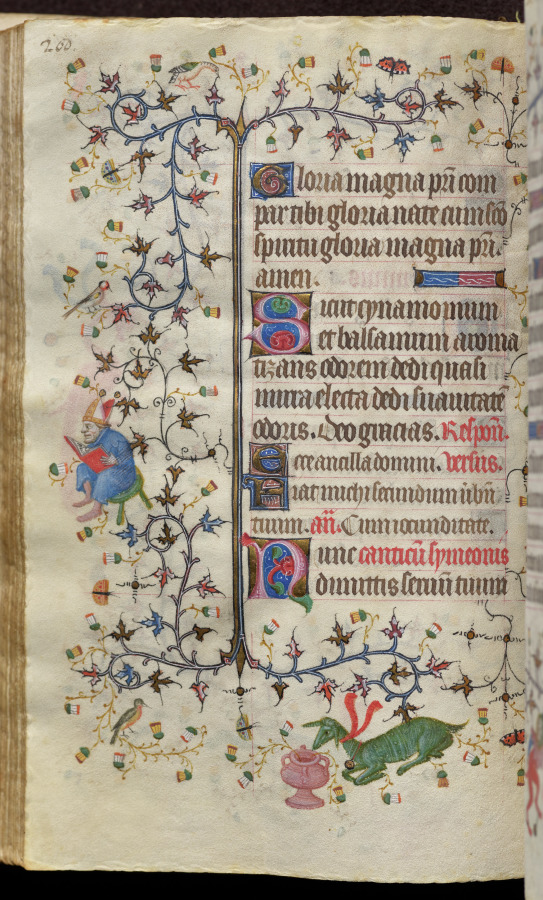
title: Hours of Charles the Noble, King of Navarre (1361-1425): fol. 100v, Text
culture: France, Paris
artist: Master of the Brussels Initials and Associates (French)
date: c. 1405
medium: ink, tempera, and gold on vellum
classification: Bound Volume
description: This precious volume was obviously highly prized by its owner, the French-born King of Navarre, who had his coat of arms painted on no less than twenty folios. Rather than directly commissioning this manuscript from a specific workshop, it seems that Charles the Noble acquired his book of hours -- perhaps ready-made for the luxury market -- while on a trip to Paris in 1404-05. A collaborative effort, six painting styles are evidenced within the pages of this codex, those of two Italians, two Frenchmen, and two Netherlanders. The painter who was responsible for the planning and decoration of the book, and who produced seventeen of the large miniatures, was a Bolognese artist known as the Master of the Brussels Initials. His principal assistant, responsible for most of the borders, was a Florentine who signed his name "Zecho" da Firenze on folio 208 verso.